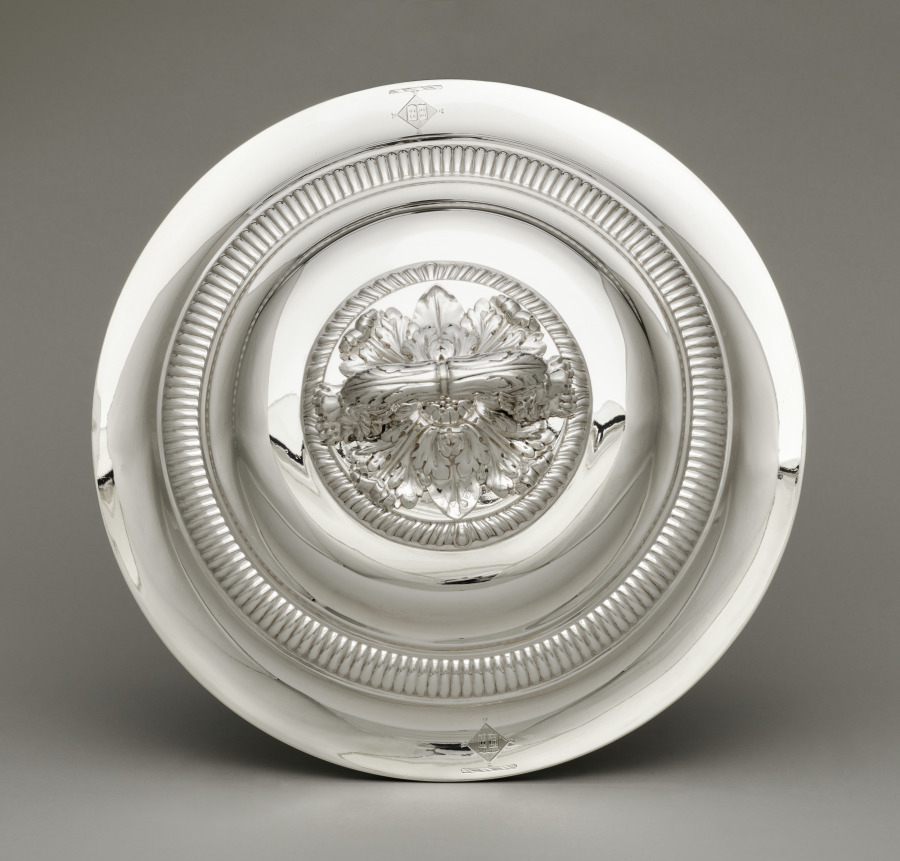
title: Cover for a Tureen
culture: England, London, 19th century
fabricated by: Paul Storr (British, 1771–1844)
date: 1812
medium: silver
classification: Silver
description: Silver fulfilled a prominent role in projecting wealth, status, power, and ritual in British life during the 1600s and 1700s. Elaborate forms such as this tureen cover, with its lionhead finials, acanthus leaves, and fluted detailing, not only represented wealth in its sheer silver weight but also provided royal and aristocratic owners a surface for displaying engraved coats of arms. The arms of the High Sheriff of Yorkshire, Timothy Hutton and his wife Elizabeth Chaytor of Spennithorne Hall in northern England are engraved on the accompanying tureen and stand by Paul Storr, one of the most prominent London silversmiths of the period.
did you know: This is a cover for a tureen. See cover record.